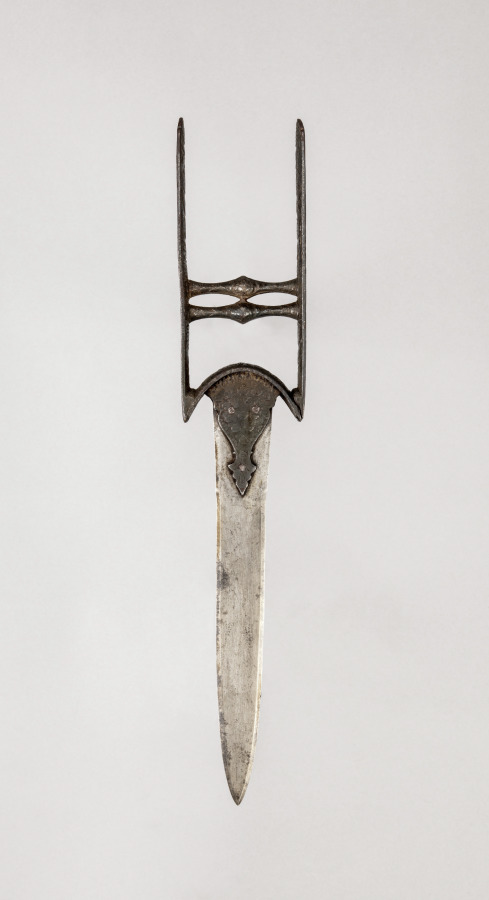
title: Khatar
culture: Northwestern India, Rajasthan, Jaipur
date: 1600s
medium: iron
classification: Arms and Armor